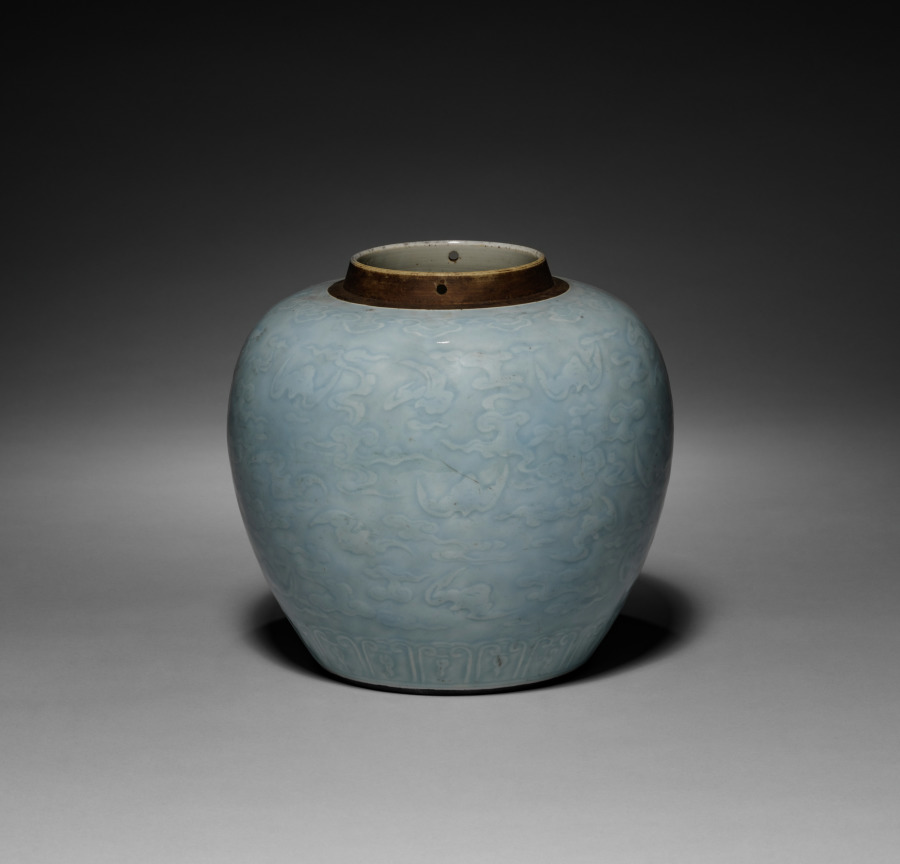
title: Jar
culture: China, Qing dynasty (1644–1911), Qianlong reign (1736–95)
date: 1736–95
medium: porcelain with molded decoration and blue glaze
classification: Ceramic